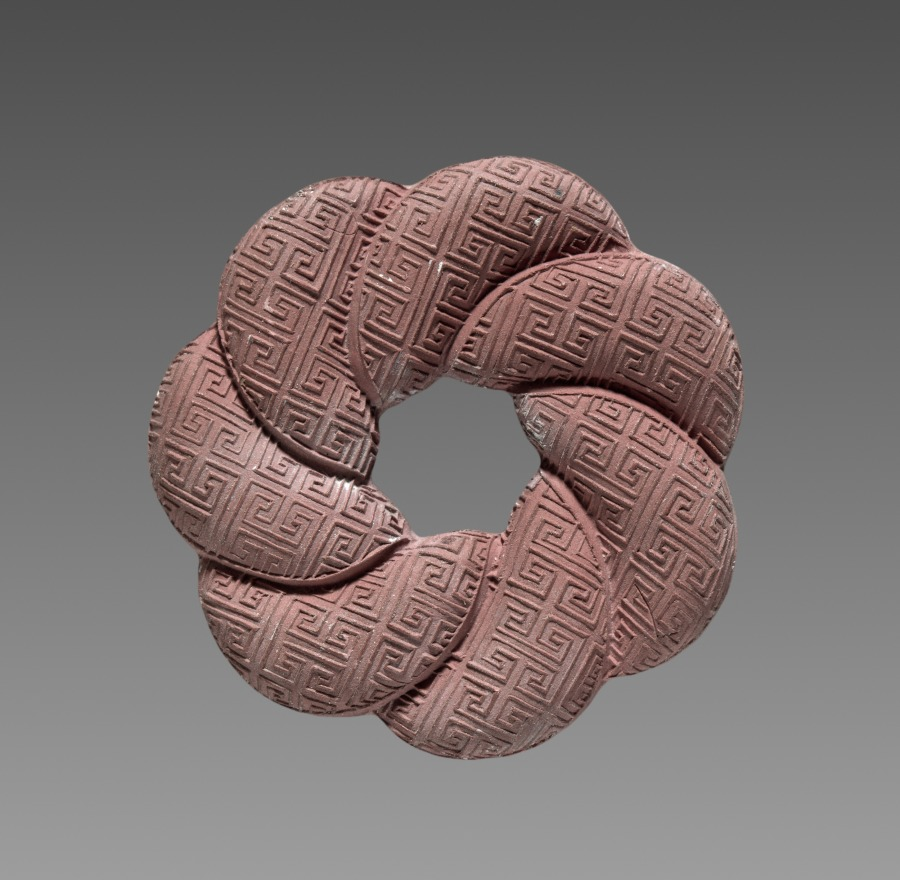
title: Box with Ink Cakes: Red Ink Cake in Shape of a Brocade Knot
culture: China, Qing dynasty (1644-1911), Jiaqing reign (1795-1820)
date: 1795–1820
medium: Molded ink in red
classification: Miscellaneous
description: Ink cakes (also called ink sticks) are dissolved with the addition of water and then ground on the surface of a flat square stone into liquid ink for painting and calligraphy. The precious ink cakes here, however, have never been used. The inscription on the side of the blue ink cake says that the set was commissioned by Chen Huai, Governor of Jiangxi Province.